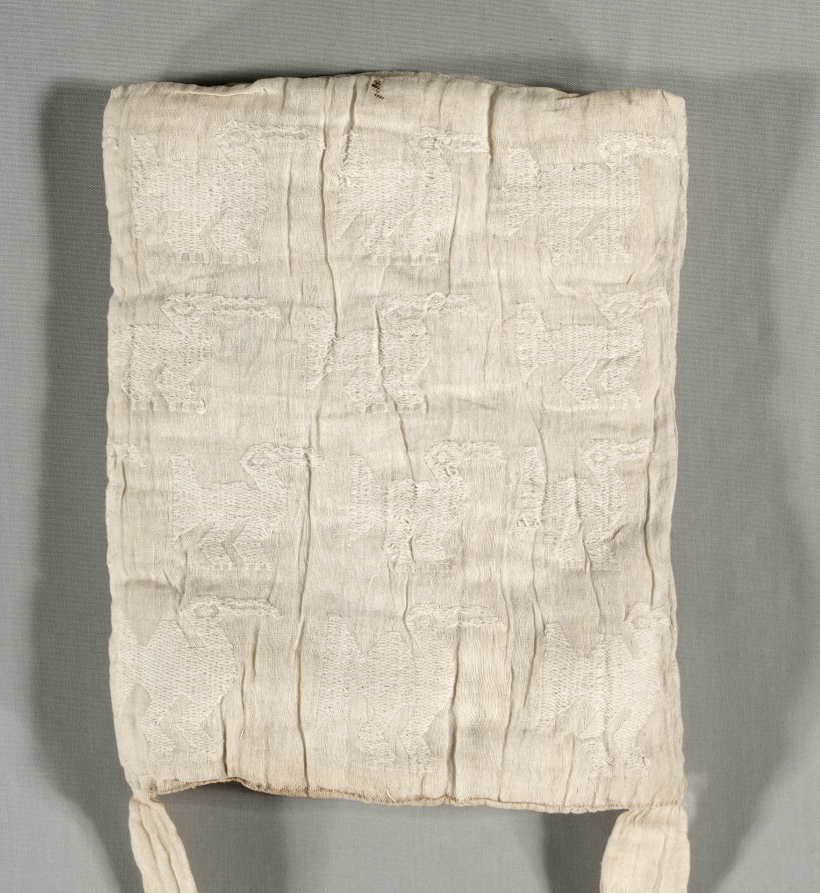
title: Padded Hat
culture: Peru, North Coast, Chimú style, 1200-1460s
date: 1460–1625 (radiocarbon date, 95.4% probability)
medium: cotton; plain weave, brocaded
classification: Garment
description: This garment may have been found with others in the collection that formed a matched set worn by a noble of the Chimú, who rose to power on Peru’s north coast after 1000 AD.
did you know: The Chimú forged an empire that thrived until the 1460s, when the Inka incorporated it into their own imperial domain.